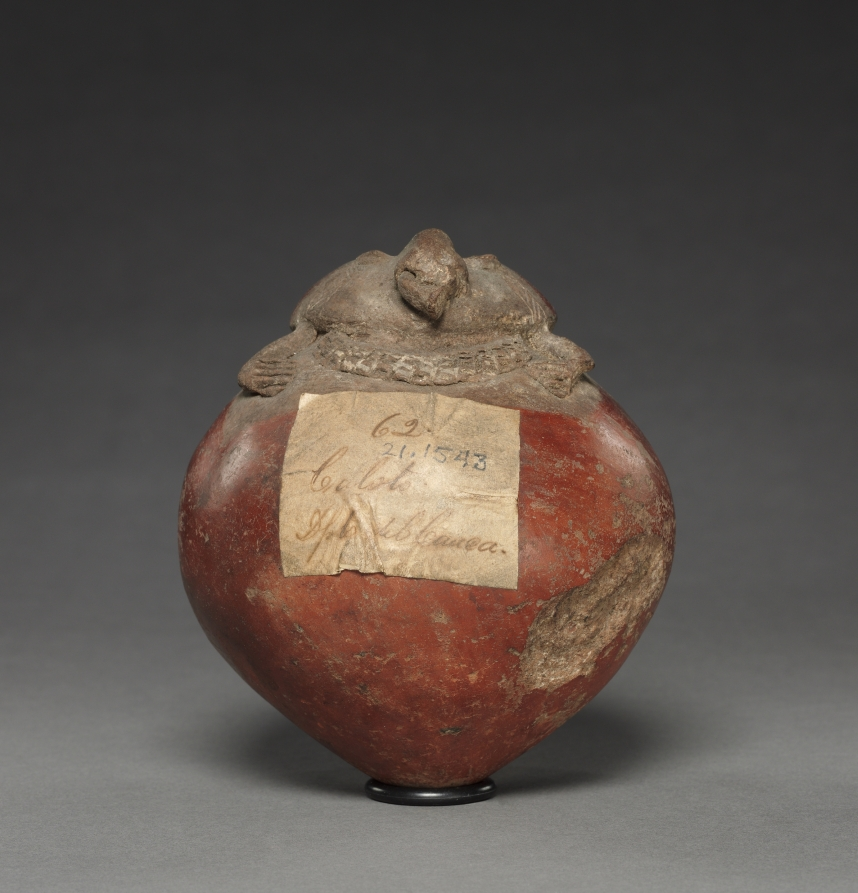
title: Dish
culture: Colombia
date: before 1550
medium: pottery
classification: Ceramic